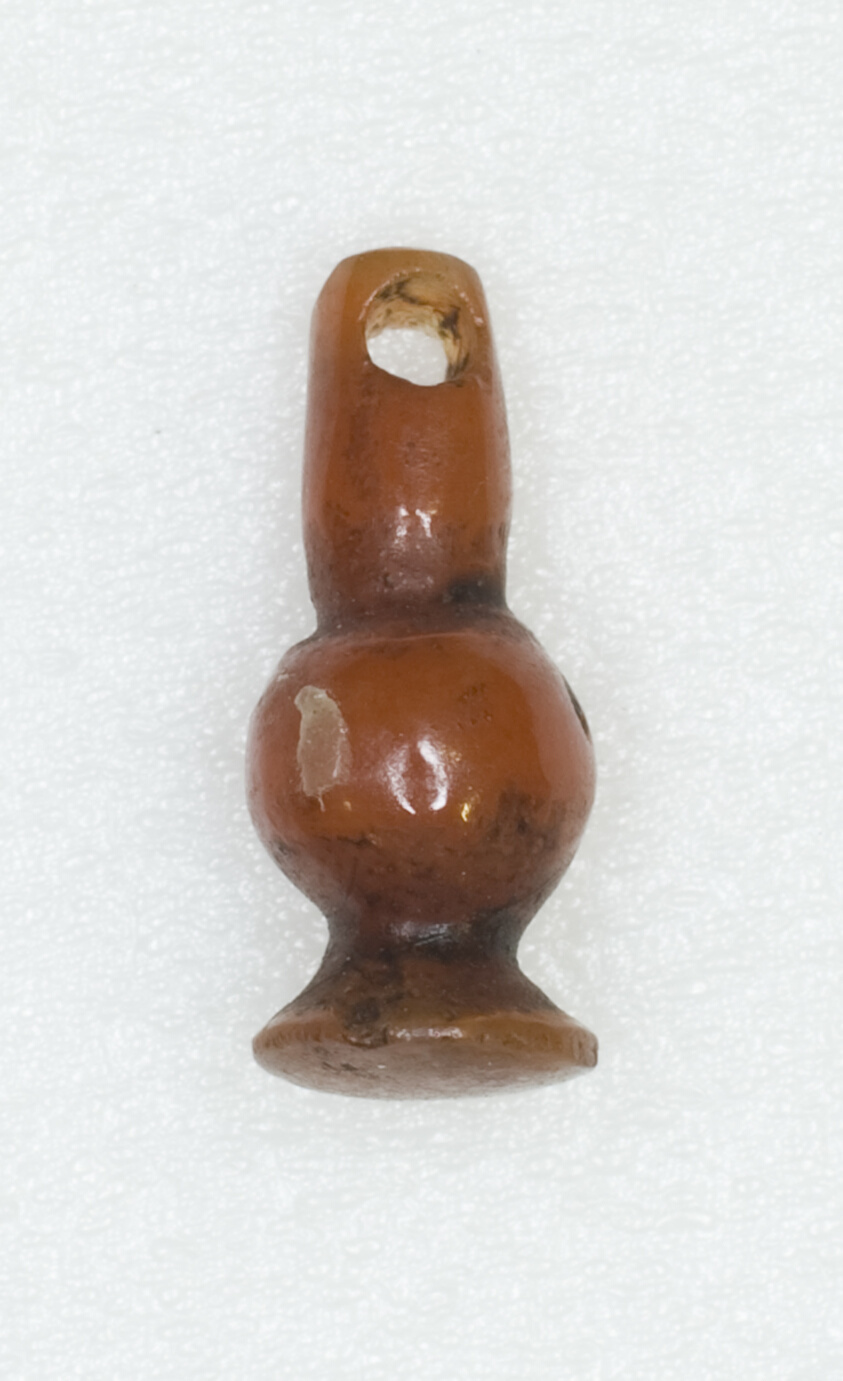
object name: Costume and Accessories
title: Pendant in the Shape of a Poppy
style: new kingdom, egyptian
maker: Egyptian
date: New Kingdom (about 1550–1069 BCE)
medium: Carnelian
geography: Egypt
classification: bead; jewelry; stone; amulet; ancient art; pendant (jewelry); costume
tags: flowers